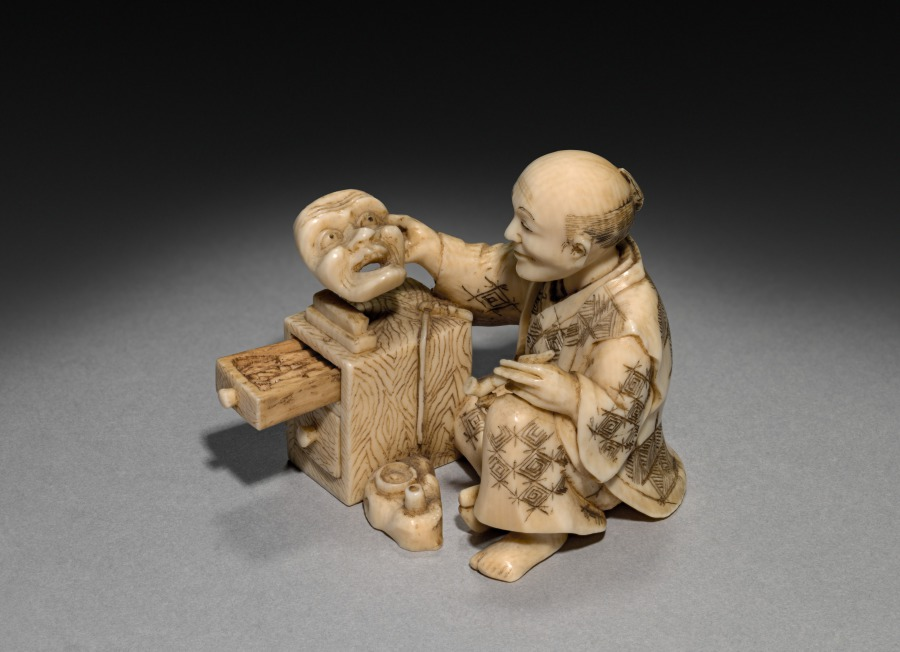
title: The Mask Maker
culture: Japan, Meiji period (1868–1912)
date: late 1800s to early 1900s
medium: ivory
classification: Ivory